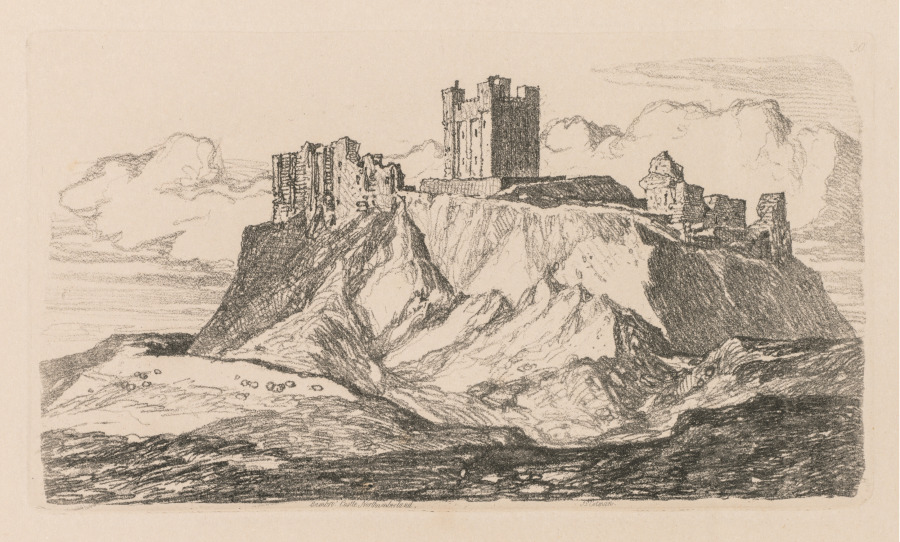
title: Liber Studiorum: Plate 30, Bambro' Castle, Northumberland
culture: England, 19th century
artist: John Sell Cotman (British, 1782–1842)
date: 1838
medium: softground etching, from a bound volume containing 48 plates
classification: Bound Volume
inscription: In plate, within image, upper right: 30; in plate, below image: Bambro' Castle, Northumberland JS Cotman